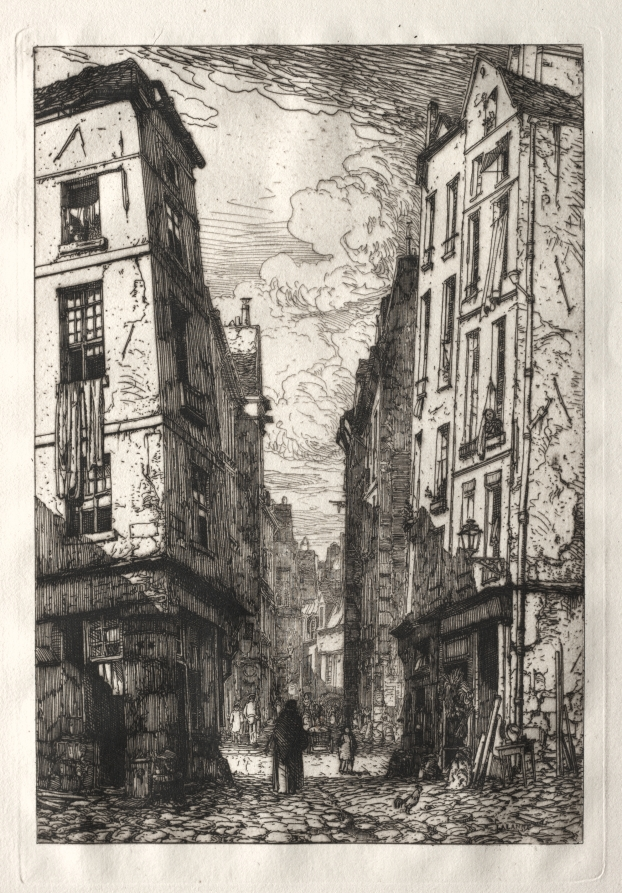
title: Rue des Marmousets (Old Paris)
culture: France, 19th century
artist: Maxime Lalanne (French, 1827–1886)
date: 1862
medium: etching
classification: Print